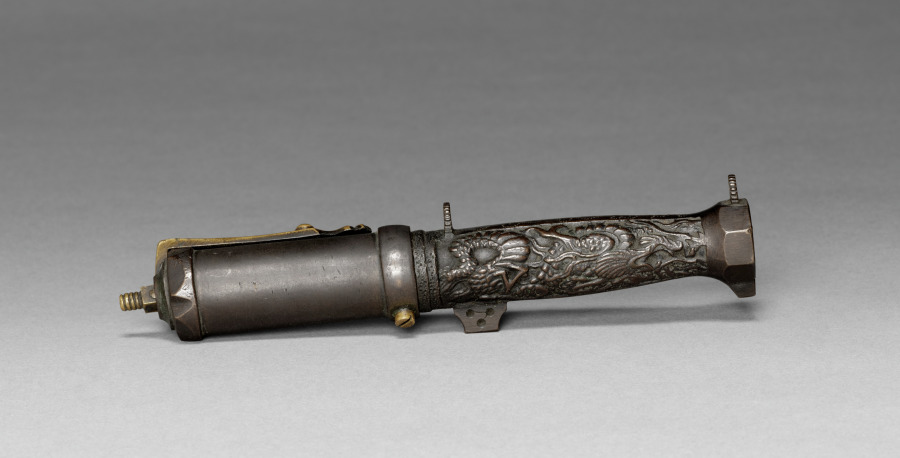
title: Hand Cannon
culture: Japan, Edo period (1615–1868)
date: 1615–1868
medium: bronze and brass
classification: Arms and Armor